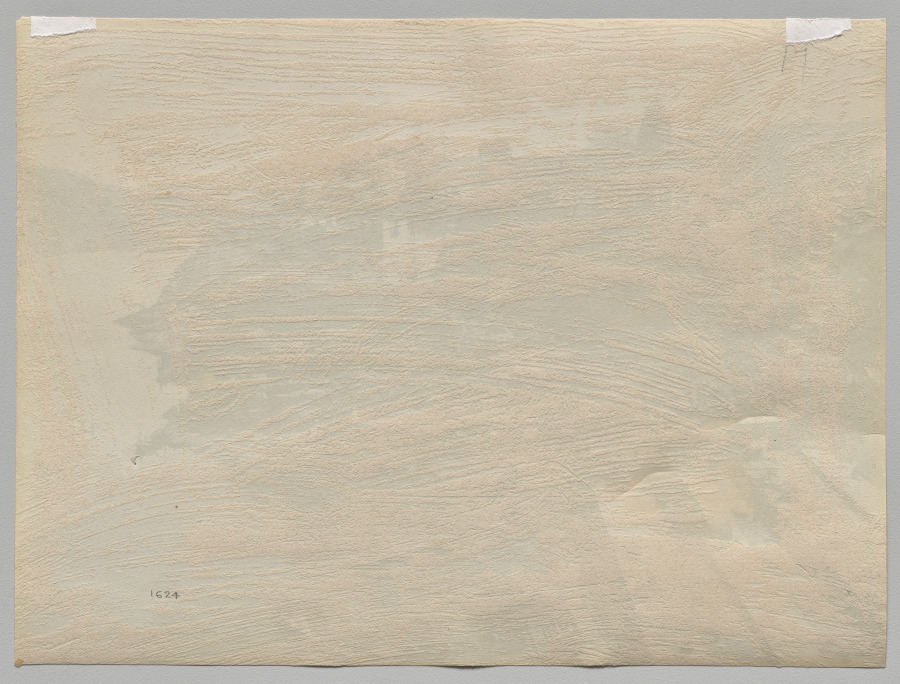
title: View of the Riverbank of the Narmada at Omkareshwar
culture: India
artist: Raja Deen Dayal (Indian, 1844–1905)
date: 1882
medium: albumen print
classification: Photograph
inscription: Graphite inscription on verso: "1624"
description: Bridges now span the river, which is dammed to the east to provide hydroelectric power. When this photograph was made, the river was an important site of trade and transportation, and the riverbank a major locale for commerce and commuting.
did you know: The Omkareshwar shrine, located on an island in the sacred Narmada River, was accessible in the 1800s only by boat.